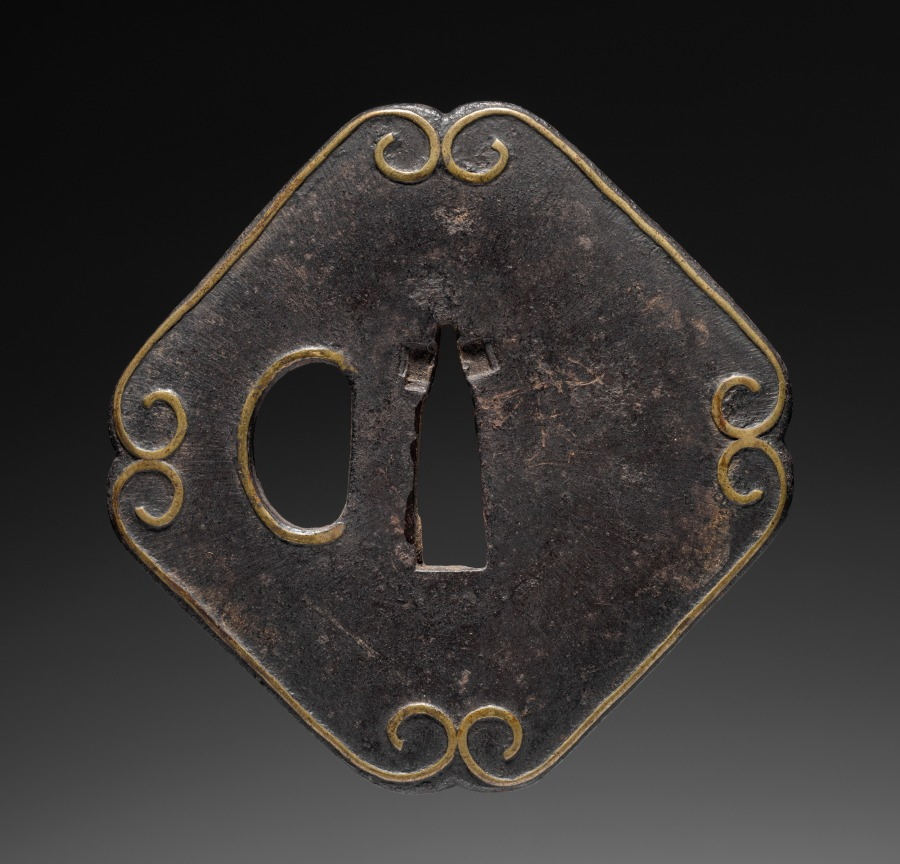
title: Sword Guard (Tsuba)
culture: Japan, possibly Edo period (1615-1868)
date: c. 1615–1868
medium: iron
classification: Arms and Armor